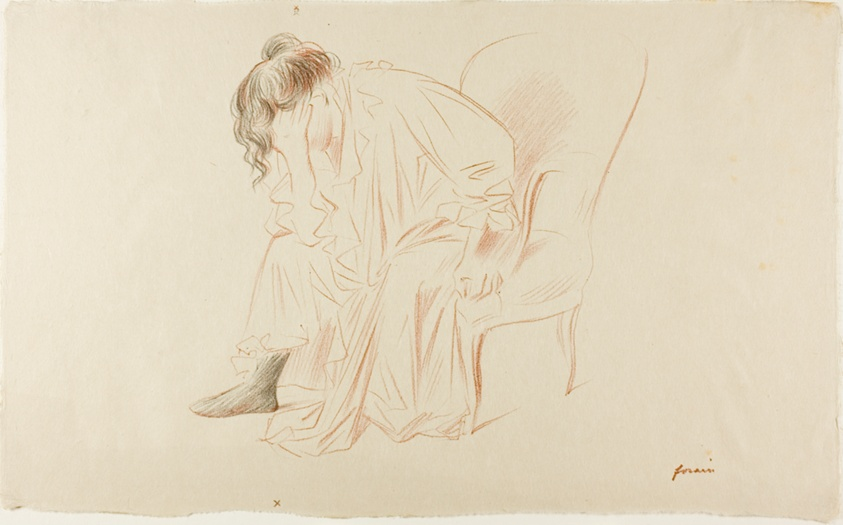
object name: Print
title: Seated Woman, Head in Right Hand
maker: Jean Louis Forain (French, 1852-1931)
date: 1897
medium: Lithograph in sanguine and black on ivory wove paper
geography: France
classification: lithograph; print; prints and drawing